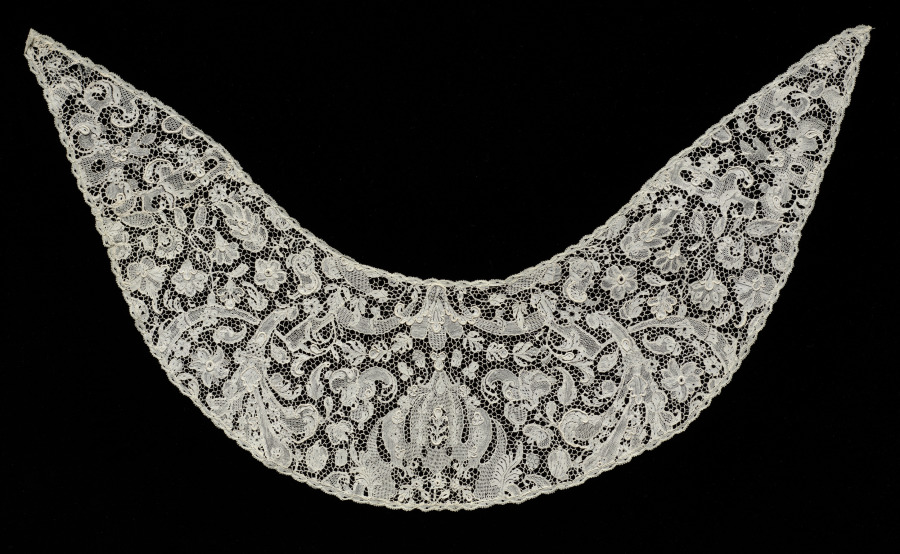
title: Lace Collar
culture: France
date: 1660–1740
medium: Linen: needle lace (Point de France)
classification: Lace